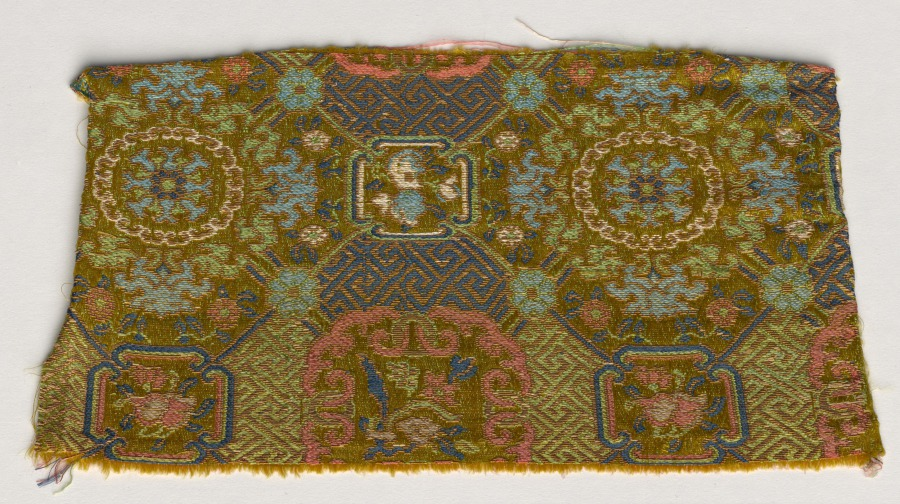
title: Textile Fragment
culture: Japan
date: 1800s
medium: silk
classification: Textile